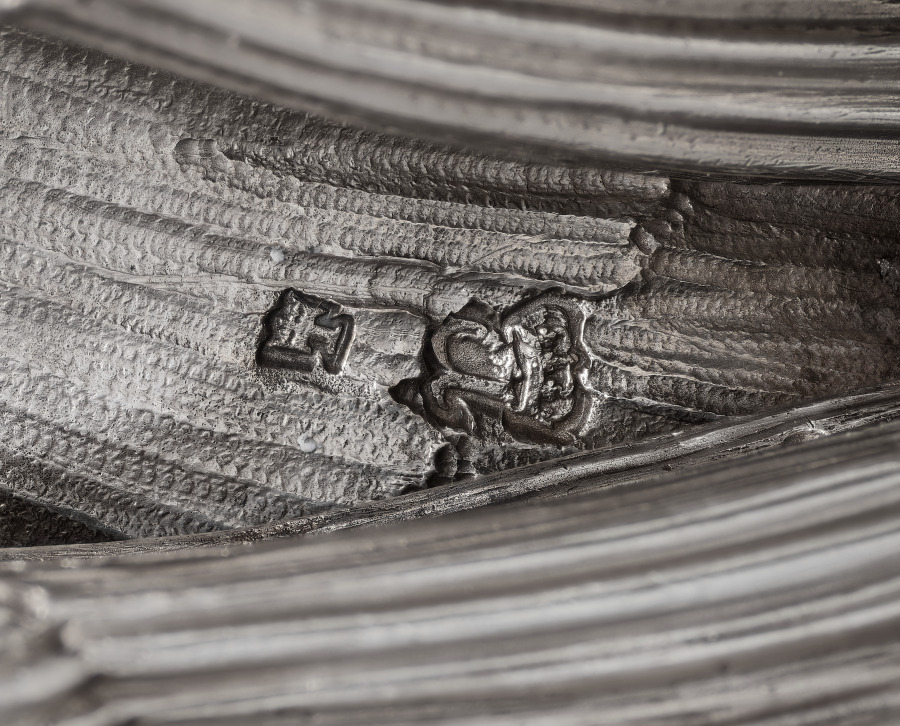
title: Tureen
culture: France, Paris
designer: Juste-Aurèle Meissonnier (French, 1695–1750)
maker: Pierre-François Bonnestrenne (French)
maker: Henry Adnet (French, 1745)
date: 1735–38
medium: silver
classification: Silver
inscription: engraved Meissonnier signature.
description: See entry for cover record 1977.182.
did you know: The langoustine, pigeon, and vegetables were cast using real examples giving the silver copies lifelike detail and appearance.